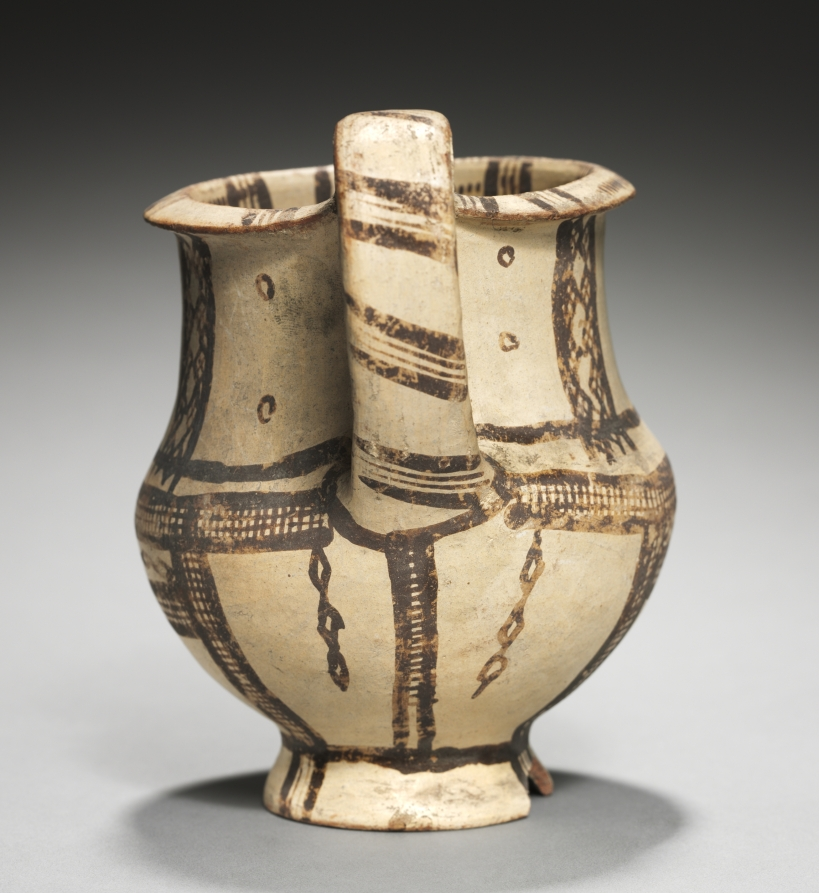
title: Jug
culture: Cyprus, late Cypriot II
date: c. 1450–1200 BCE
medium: white slip ware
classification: Ceramic